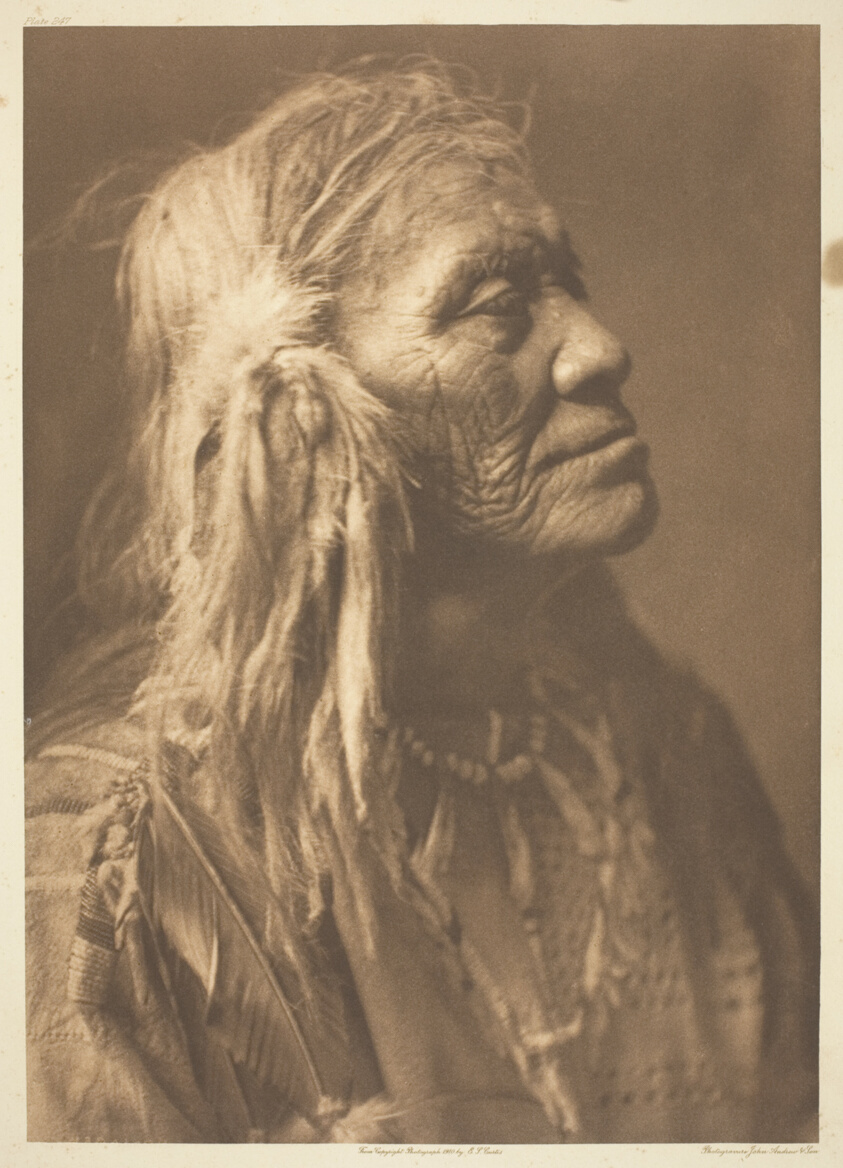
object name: Photograph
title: Luqaíôt - Kittitas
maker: Edward S. Curtis (American, 1868–1952)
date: 1910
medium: Photogravure, plate 247 from "The North American Indian, Volume 7" (1911)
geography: United States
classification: photogravure; photomechanical process; photography; photograph